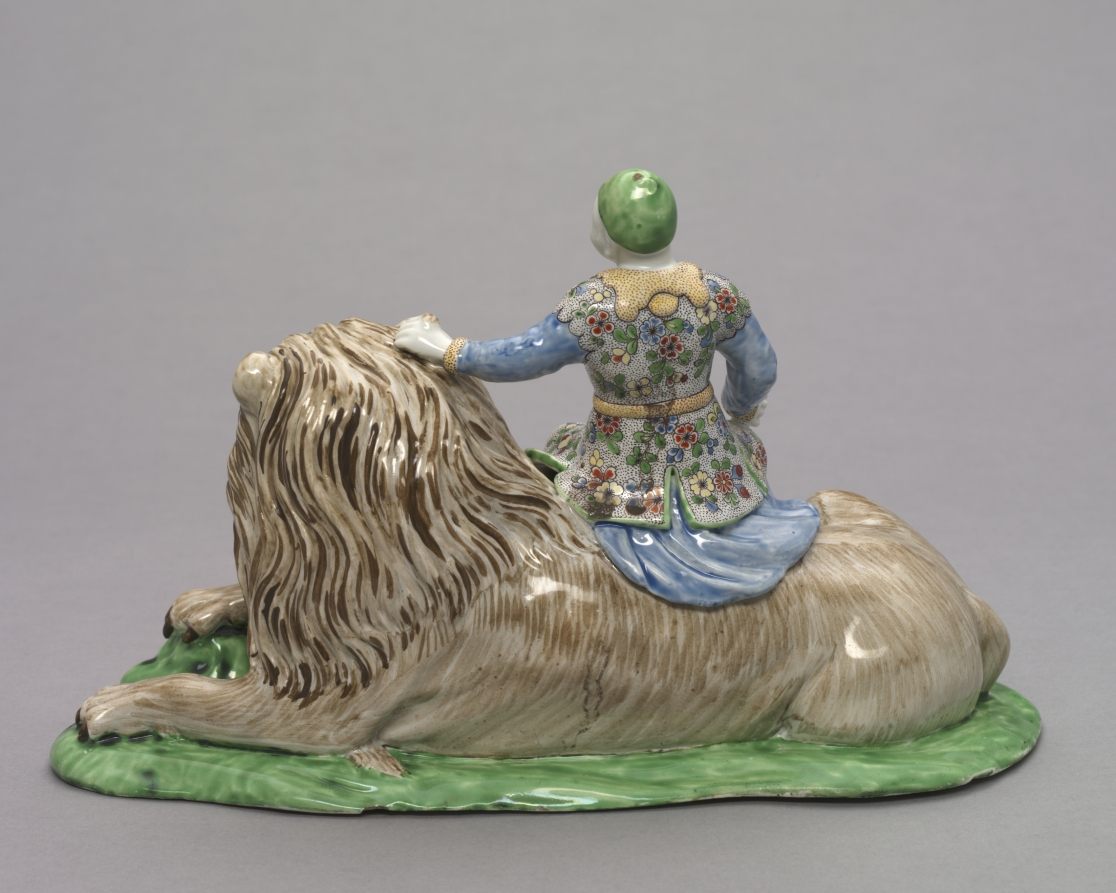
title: Figure Seated on a Lion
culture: France, 18th century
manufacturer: Chantilly Porcelain Factory (French)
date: c.1740–45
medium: Tin-glazed soft-paste porcelain with enamel decoration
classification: Ceramic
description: Exotic animals were highly coveted symbols of status and wealth. The practice of housing them in a centralized complex was popularized by French King Louis XIV’s menagerie at Versailles. This lion, along with other animal figurines produced at the factory, may have been modeled after living examples housed in the menagerie established by Louis Henri, duke of Bourbon, prince of Condé, and founder of the Chantilly porcelain factory.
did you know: The duke of Bourbon’s menagerie was recorded in the dedication to Jean-Antoine Fraisse’s Livre de Desseins Chinois (Book of Chinese Drawings), a book that documented the decoration on the duke’s collection of Asian porcelain, lacquer, and textiles.